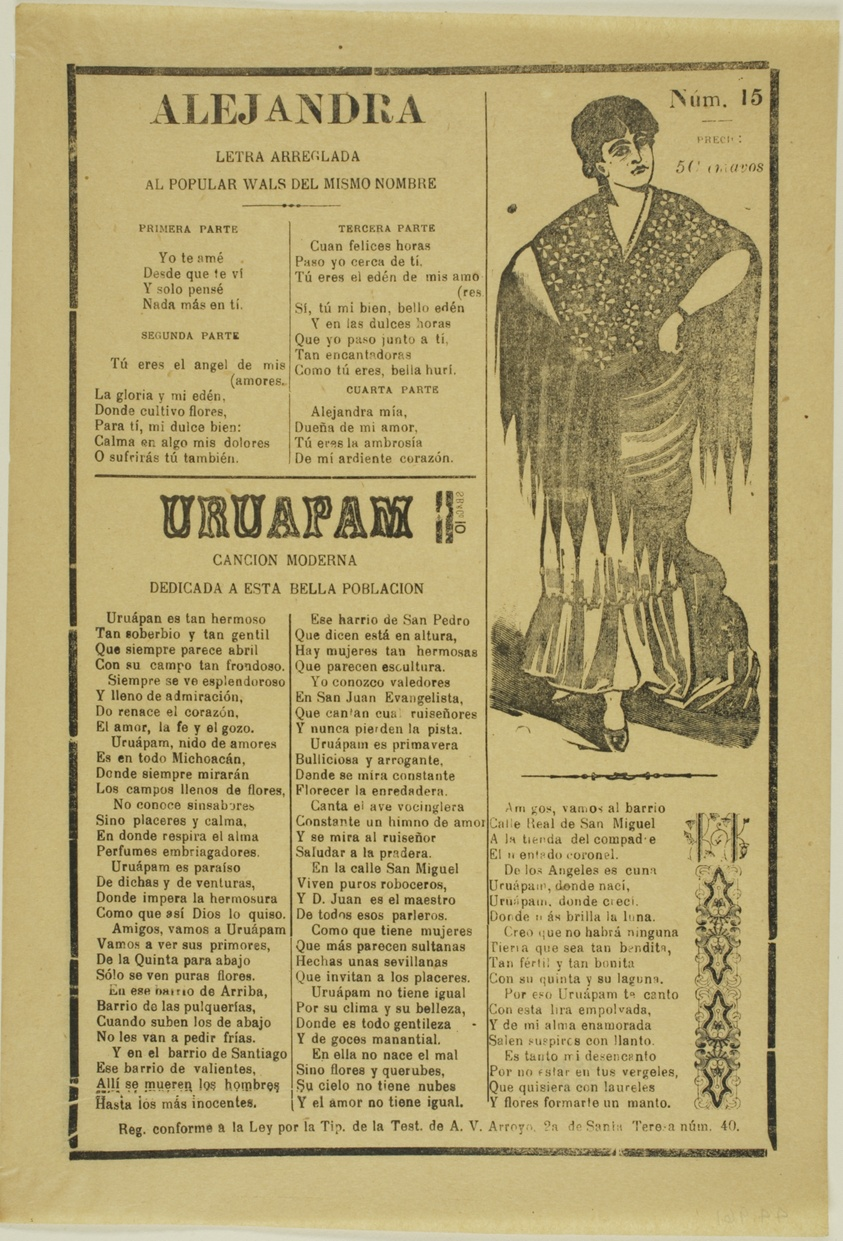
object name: Print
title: Alejandra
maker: José Guadalupe Posada (Mexican, 1852-1913)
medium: Relief print on paper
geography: Mexico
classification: woodcut; print; prints and drawing